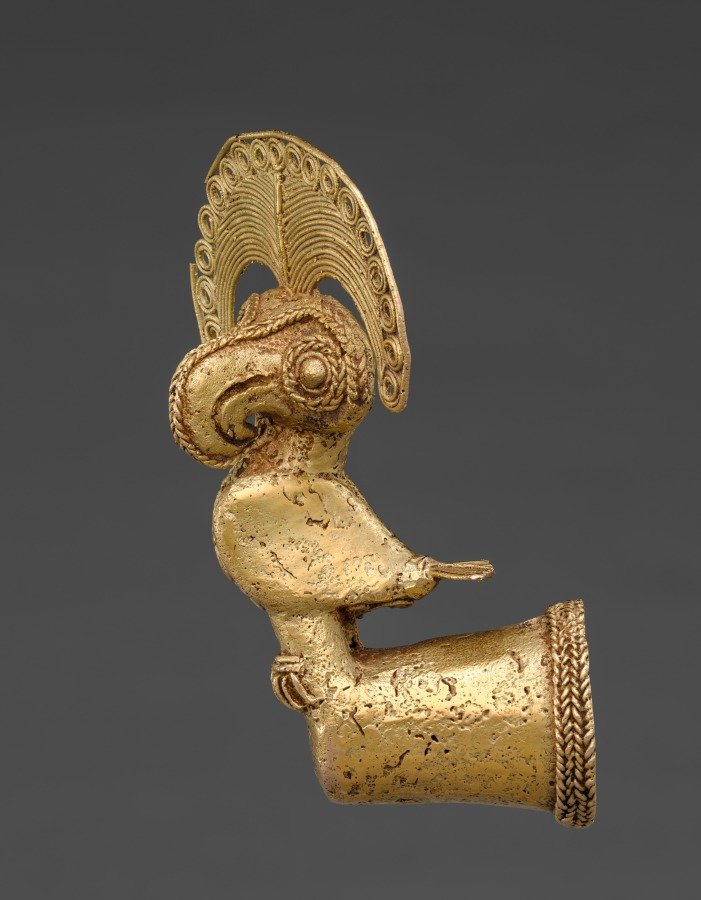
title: Finial with Bird (Harpy Eagle with Royal Flycatcher Crest?)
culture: Isthmian Region (Colombia), Sinú (Zenú), 5th century-11th century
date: 400–1000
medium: gold, cast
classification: Metalwork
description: This gold finial fit over the end of a staff, an emblem of rank. The bird has the hooked beak of a raptor—perhaps the harpy eagle, the “king” of tropical forests. The enormous crest, however, may be inspired by the Royal Flycatcher, a smaller bird that fans its unique, brilliantly colored crest during mating.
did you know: A museum visitor corrected our identification of this bird!